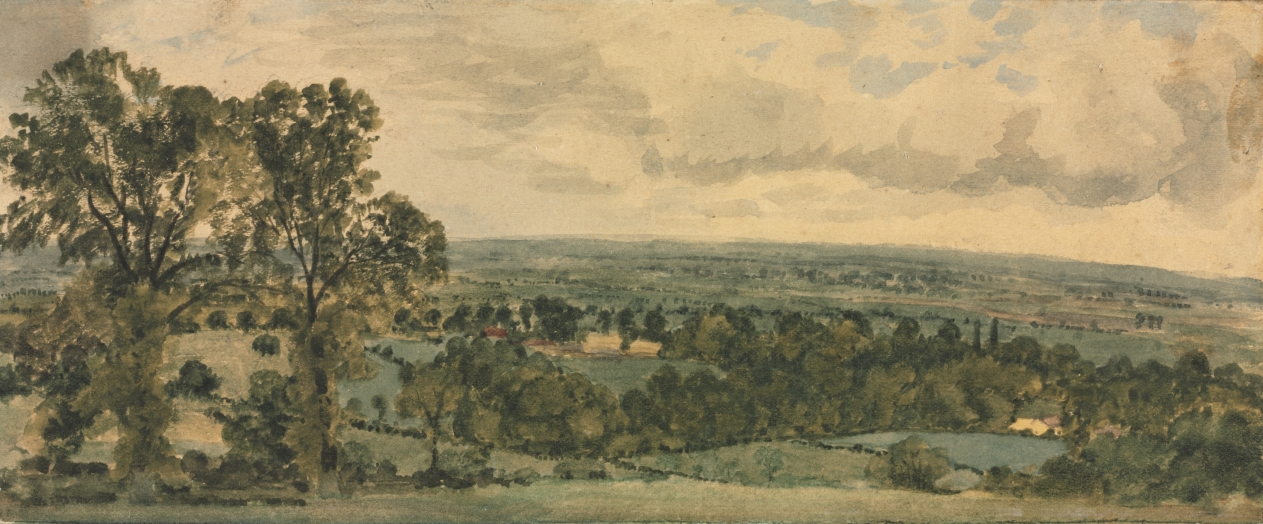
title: Landscape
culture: England, 19th century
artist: John Constable (British, 1776–1837)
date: c. 1796–1837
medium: watercolor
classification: Drawing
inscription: Inscribed on verso: "This drawing was presented to Miss Tham by Constable as a memento of his regards"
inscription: inscribed on verso: "E. Hope to E.F. White Esq."